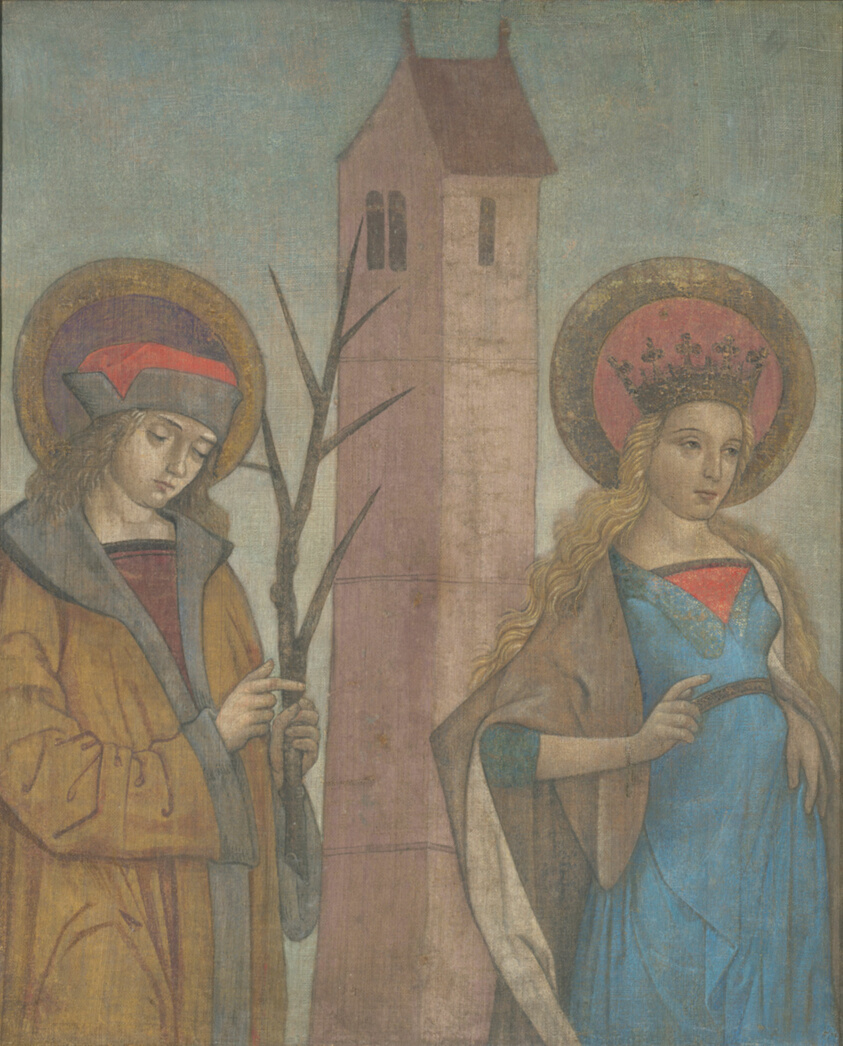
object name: Painting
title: Diptych of Saints Achatius, Barbara, Apollonia, and Sebald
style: 15th century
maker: German; Franconia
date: c. 1490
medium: Distemper on linen, mounted on panel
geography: Germany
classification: painting; paint; german; european painting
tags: saints, Christian subjects, Christianity, church, crowns, Devotion, Germany, men, religion, religious, tower, women